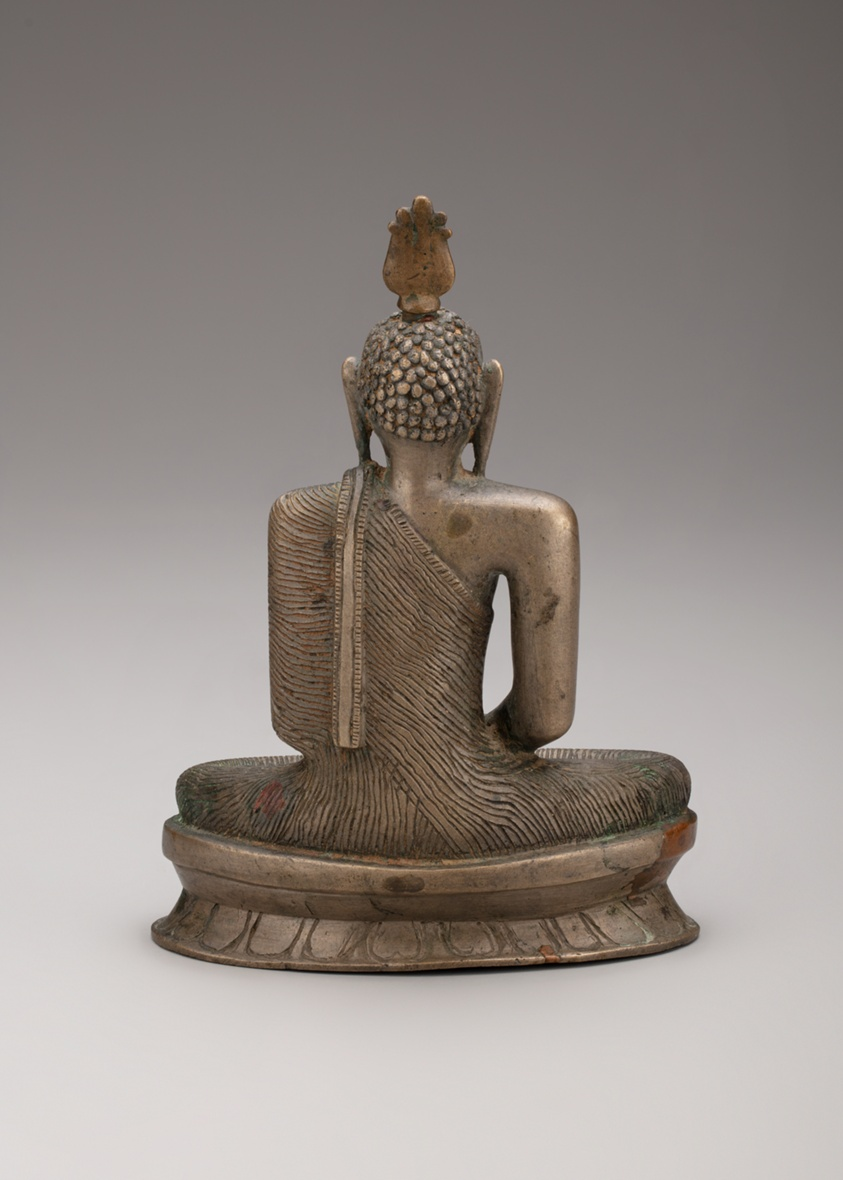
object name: Sculpture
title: Buddha Seated in Meditation (Dhyanamudra)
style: South Asian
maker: Sri Lanka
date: Kandyan period, 18th century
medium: Bronze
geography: Sri Lanka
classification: bronze; metal; sculpture; asian art